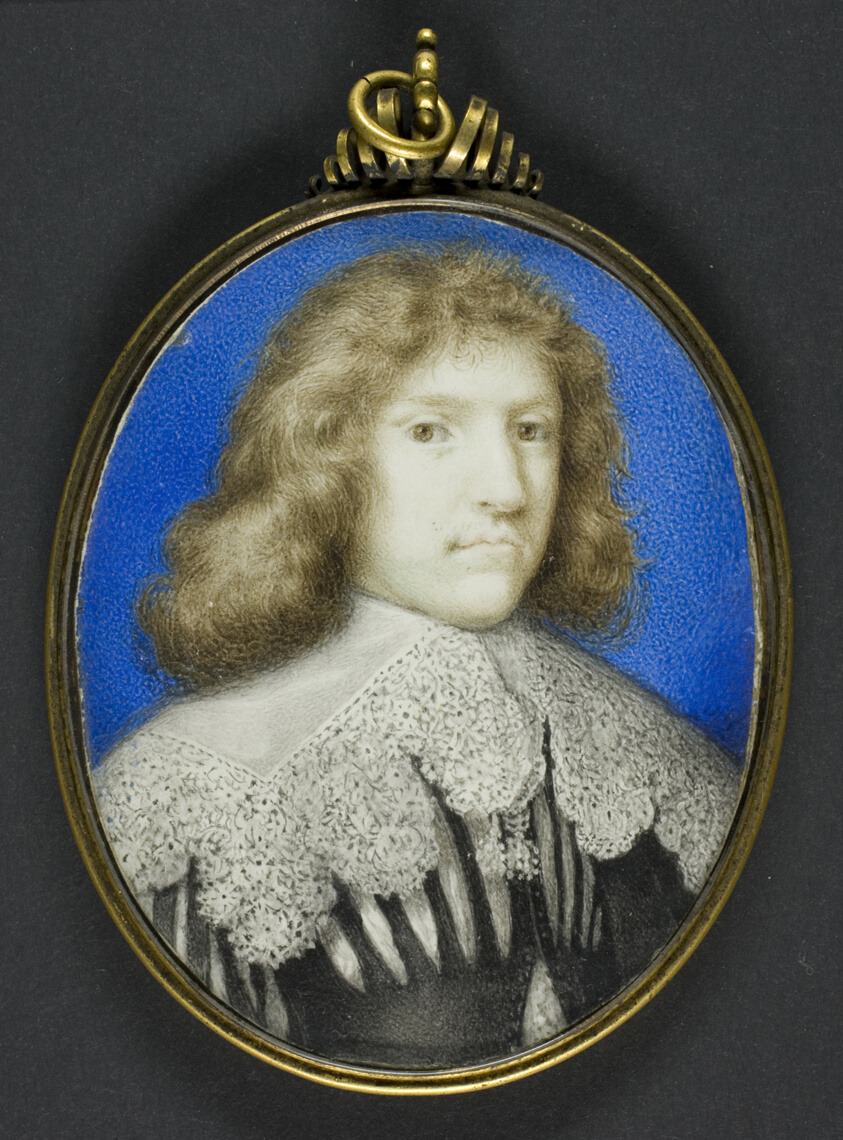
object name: Miniature Painting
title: Portrait of a Nobleman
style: 17th Century, 18th Century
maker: William Gibson (English, 1644–1703)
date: 1675/1700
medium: Watercolor heightened with gum arabic on paper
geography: England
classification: miniature painting; european decorative arts; european painting; miniature; portrait; portrait; british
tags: portrait, portraits, black (color), blue, blue (color), lace, man, portraits: male subject